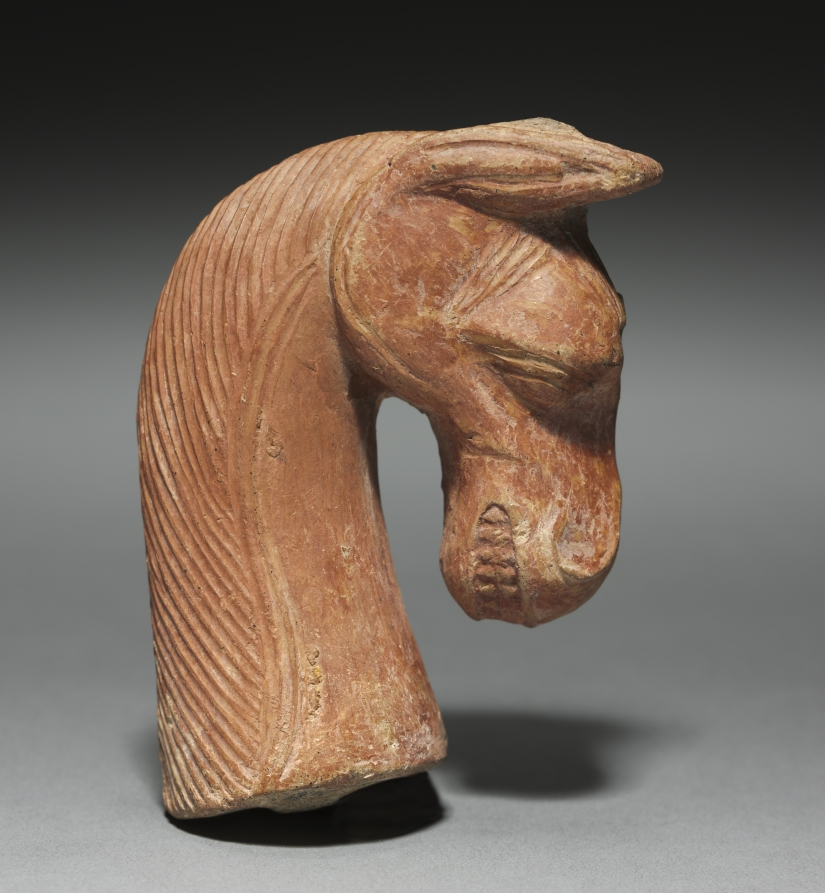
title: Horse Head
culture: Italy, Villanova, Etruscan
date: 700s BCE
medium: terracotta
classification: Ceramic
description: Probably mold-made, this terracotta horse head is finely modeled in high relief, its burnished surface embellished with carefully rendered details such as a textured mane and bared teeth.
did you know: The backside of this horse head is unworked.